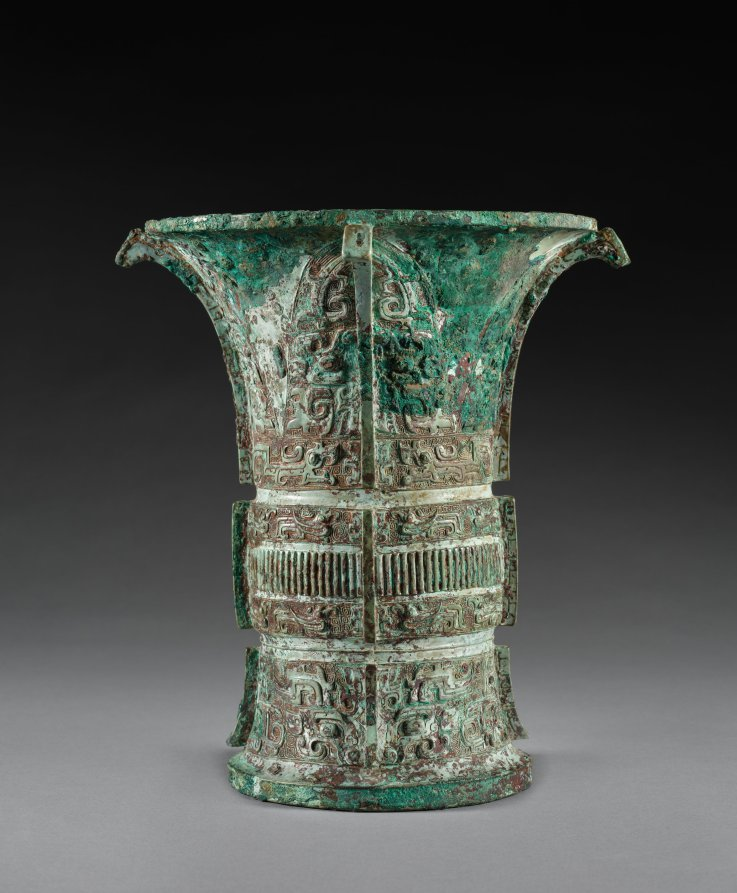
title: Wine Vessel (Fu Wu Zun)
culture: China, Western Zhou dynasty (c. 1046–771 BCE)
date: c. 1000–900 BCE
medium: bronze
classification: Metalwork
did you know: This vessel is decorated with dragons and taotie, a stylized monster face motif frequently found on ancient Chinese ritual bronzes.